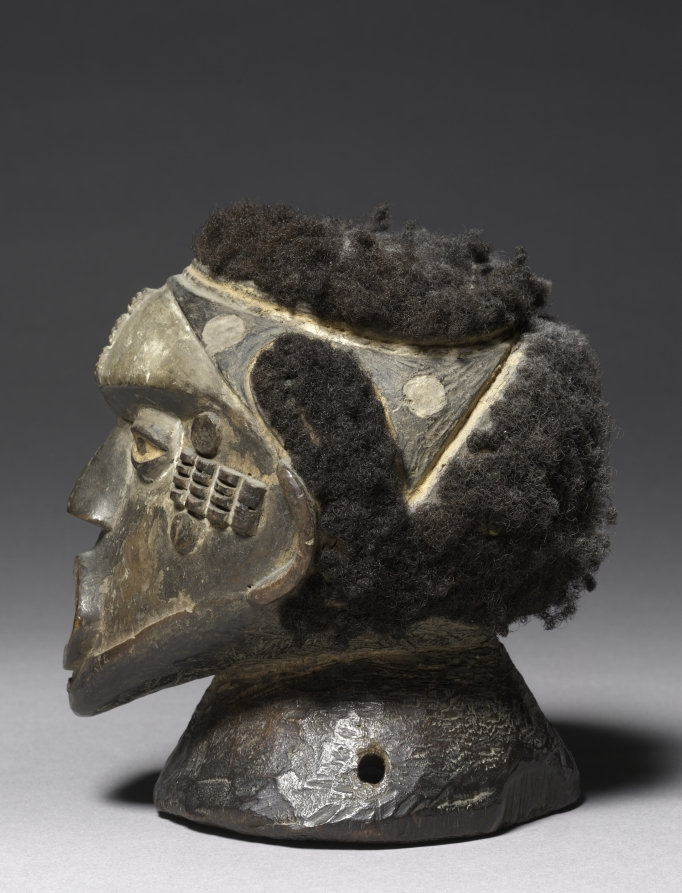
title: Headdress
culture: Africa, West Africa, Nigeria, Idoma-style carver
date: early 1900s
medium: Wood, human hair, paint, and possibly kaolin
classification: Mask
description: This was used in masked performances of the Agrinya society, a powerful guild formerly restricted to men who had killed an elephant, lion, or man. The white pigment connotes the realm of the ancestors, while the aggressive expression of the face seems to suggest the courage of Agrinya society members.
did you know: Holes in the neck once attached a flat raffia disk or strings for wearing the headdress-type mask on top of the head.